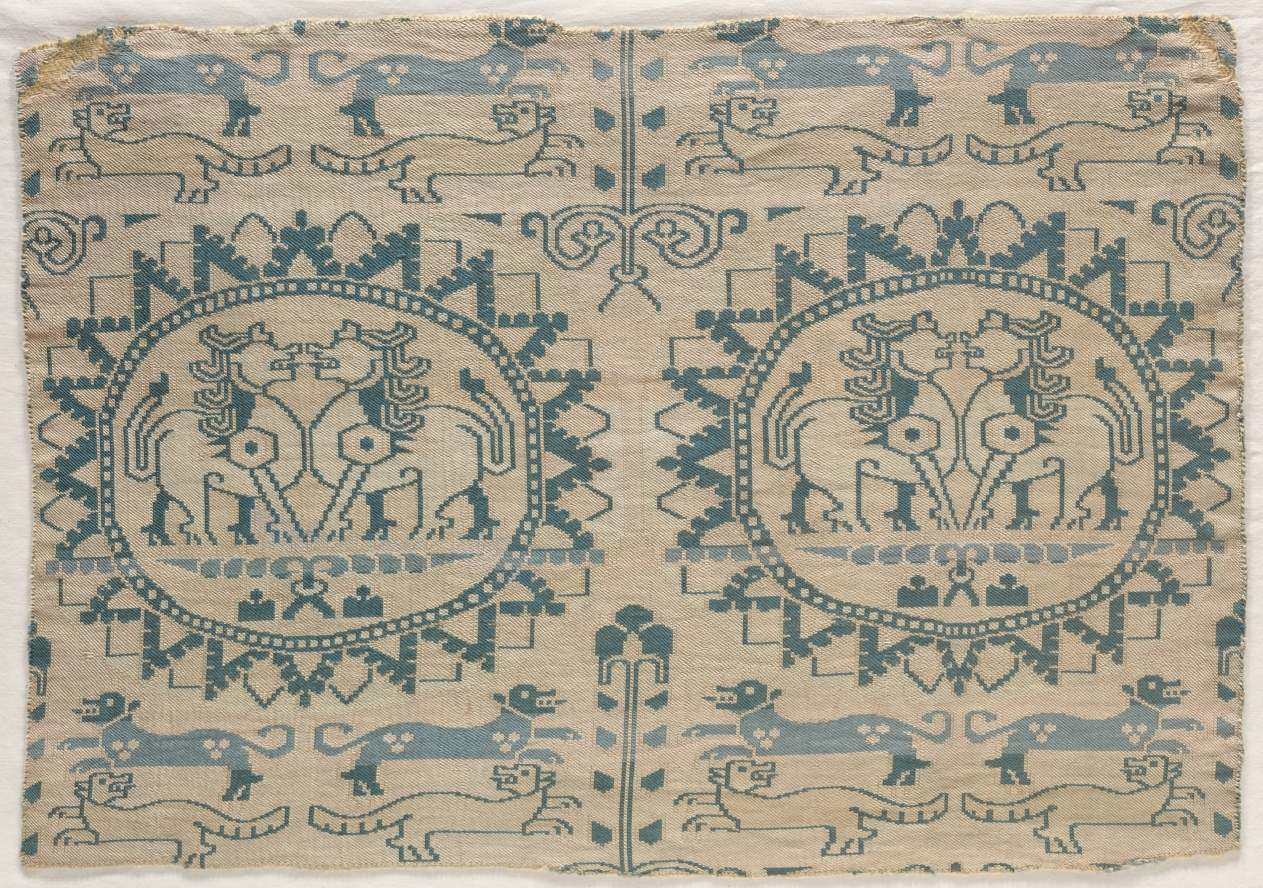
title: Copy of a Zandaniji Silk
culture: France, Lyon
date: early 1900s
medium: compound twill weave woven on Jacquard loom; silk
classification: Textile